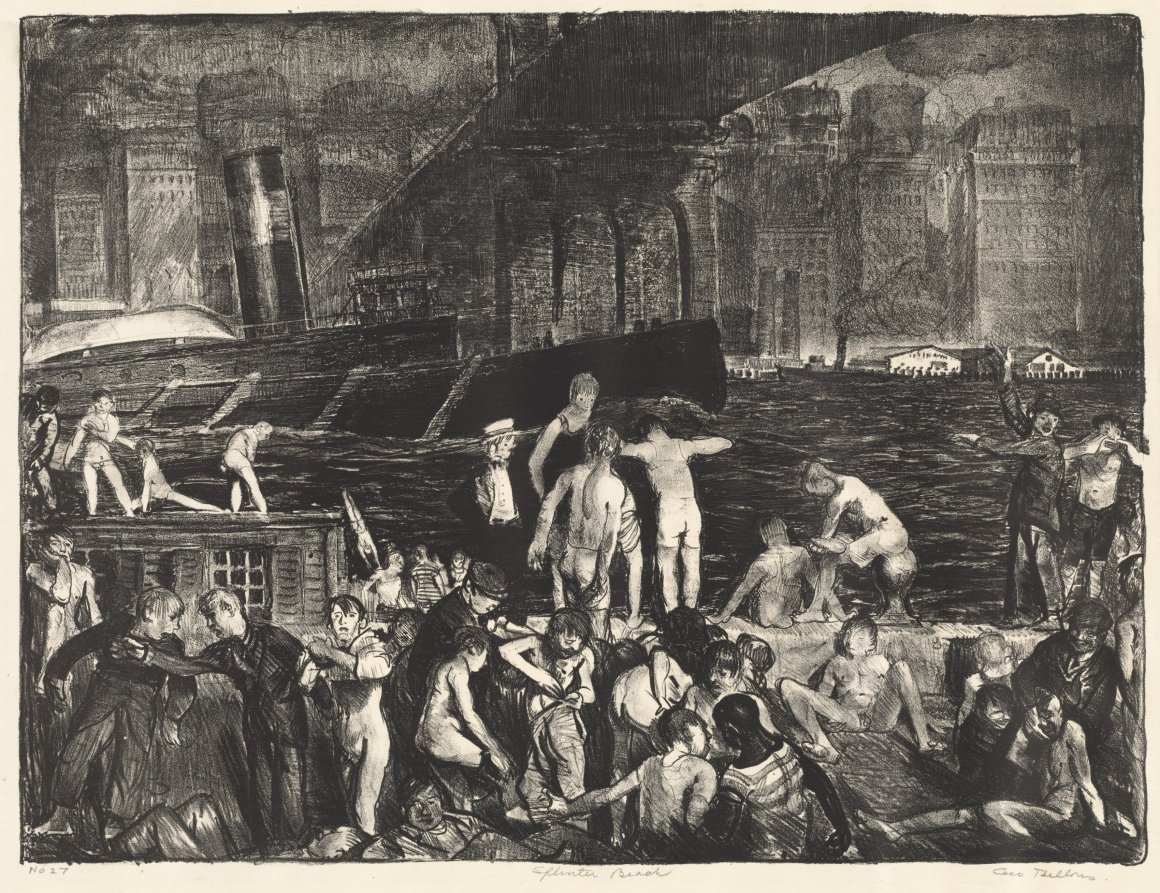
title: Splinter Beach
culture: America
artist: George Bellows (American, 1882–1925)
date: 1916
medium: lithograph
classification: Print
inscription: In graphite, lower left, recto: "No 27"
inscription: In graphite, center, recto: "Splinter Beach"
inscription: In graphite, lower right, recto: "Geo. Bellows"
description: During George Bellows’s first decade in New York City, starting in 1904, newspapers ran many stories about the “social problem” of the urban poor, reporting that the city’s tenement district lacked cleanliness and order. Drawn to this unvarnished side of city life, Bellows made several images of the public docks along the East River that were unofficial places of recreation for the city’s tenement children. Both Splinter Beach and River-Front feature, without sentimentality, children that display their nakedness unabashedly. Disturbingly, both images feature fully clothed adults observing or even touching children, as well as other sexual touching. Portrayals of sexual indecency in Bellows’s work aligned with the off-color humor often found in fictional representations of the urban poor of the time.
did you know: Splinter Beach was located under the Brooklyn Bridge, the underside of which can be seen in this image.